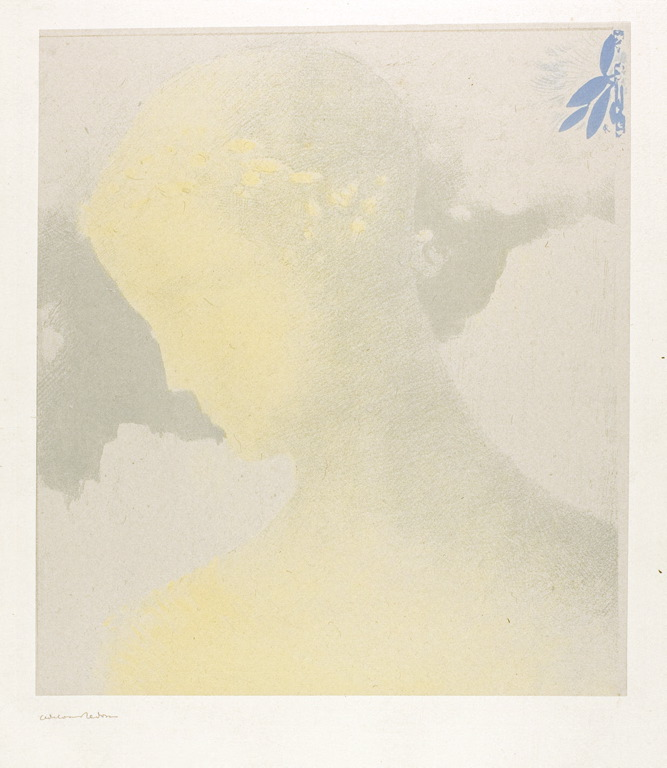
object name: Print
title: Beatrice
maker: Odilon Redon (French, 1840-1916)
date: 1897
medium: Lithograph in yellow, blue, and green on light gray China paper laid down on cream wove paper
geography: France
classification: lithograph; print; prints and drawing; paper